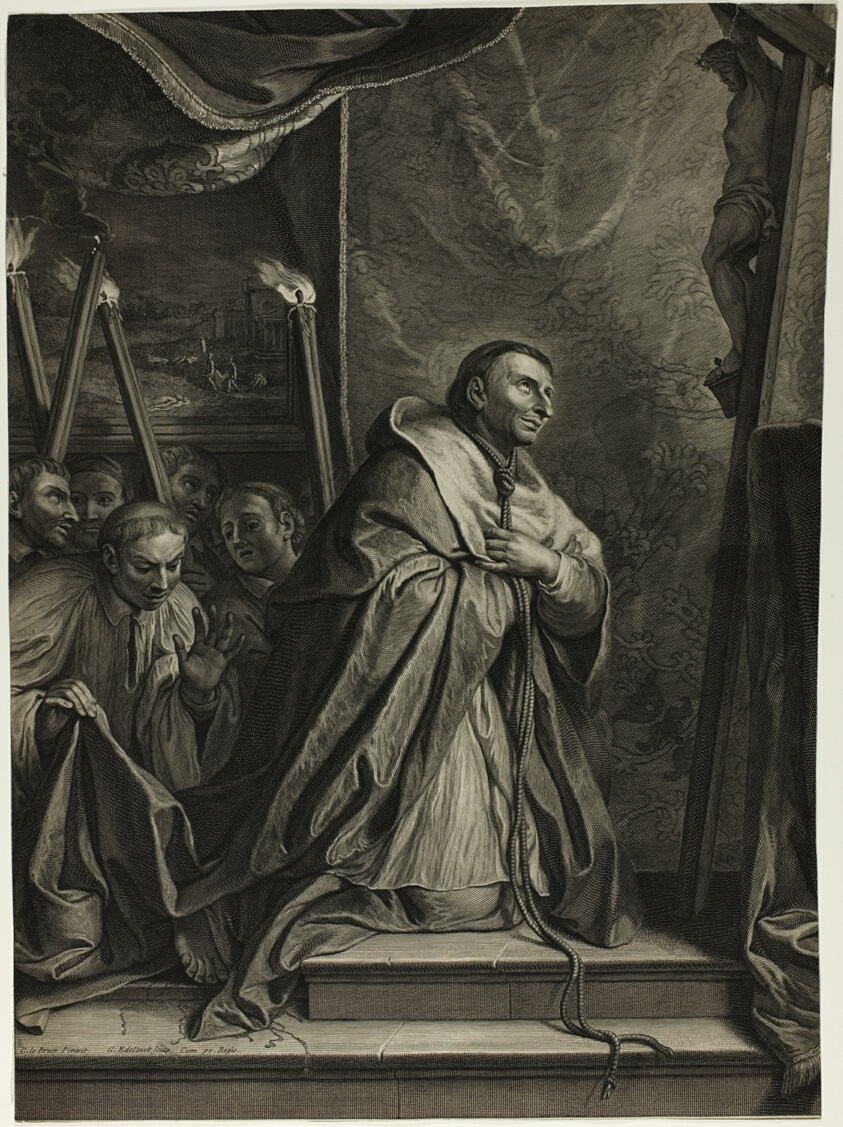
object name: Print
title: St. Charles Borromée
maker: Gérard Edelinck (French, born Flanders, 1640-1707); after Charles Le Brun (French, 1619-1690)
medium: Engraving on ivory laid paper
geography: France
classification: engraving; print; prints and drawing